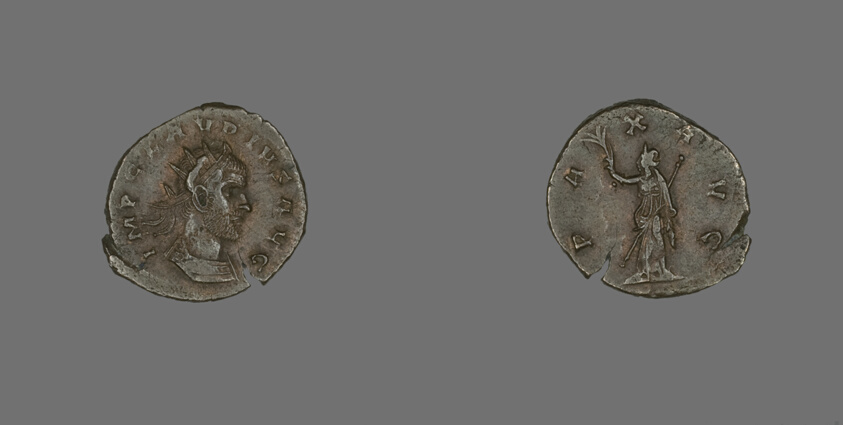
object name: Coin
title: Coin Portraying Emperor Claudius Gothicus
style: imperial (roman), ancient, roman (ancient, style or period)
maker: Roman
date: 268-270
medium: Bronze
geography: Roman Empire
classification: coin; struck; ancient art